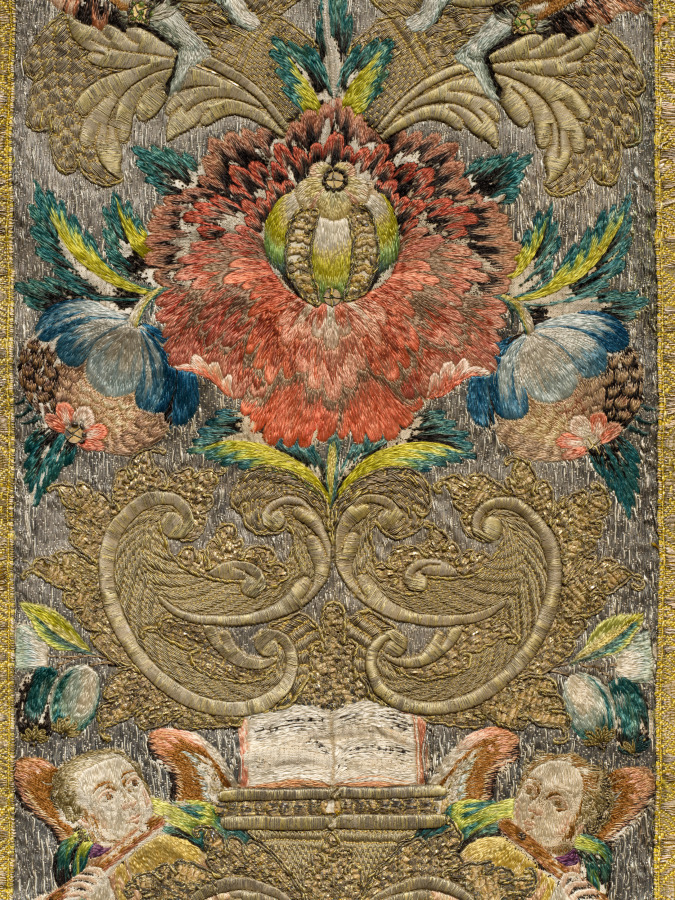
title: Chasuble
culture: Germany, Bavaria, last quarter of 17th century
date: 1675–99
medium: Silk and metallic threads on silk tabby sewn down on a linen tabby ground; embroidery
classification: Embroidery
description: This rare chasuble decorated with angels, musicians, pomegranates, and flowers represents Sacred and Profane Love. This is indicated by two figures—a clear-sighted figure embracing a blindfolded figure—standing on a globe in the upper center and also by the musicians. The angels play soft-sounding instruments (harpsichords, harps, viole da barccio, and flutes) while earthy figures play loud instruments (tambours and hunting horns). The chasuble was most likely part of a liturgical set commissioned for a wedding. This entire chasuble is embroidered with silk and metal thread laid over linen and stitched in place. The exceptionally fine workmanship, lavish use of gold and silver, and brilliant silk thread create this sumptuous vestment.